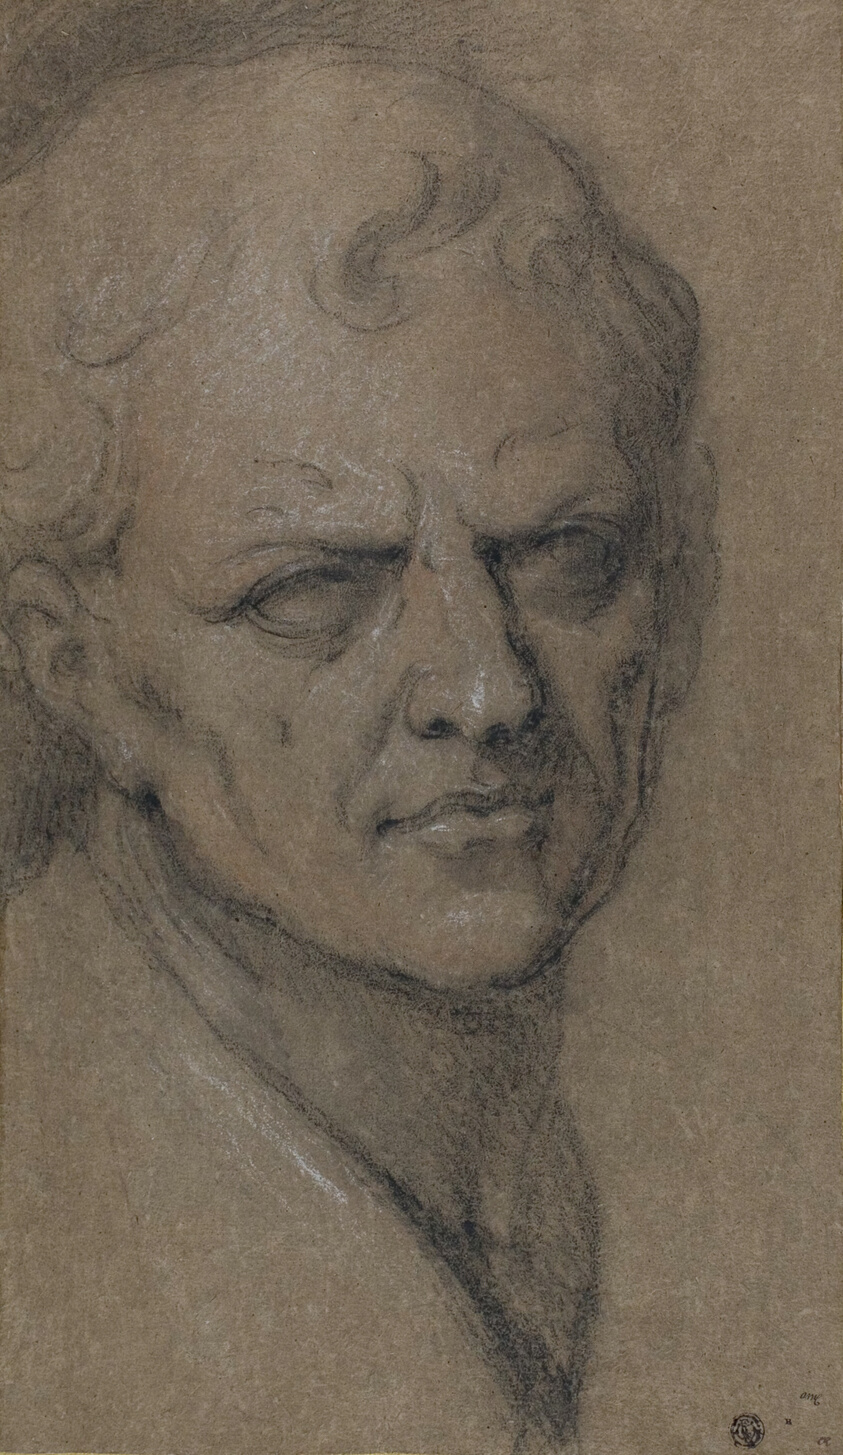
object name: Drawing and Watercolor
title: Roman Portrait Bust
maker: Follower of Jacopo Robusti, called Tintoretto; Italian, 1519-1594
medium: Black chalk, heightened with white and red chalk, on brown laid paper, laid down on ivory laid paper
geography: Italy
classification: chalk; drawings (visual works); prints and drawing